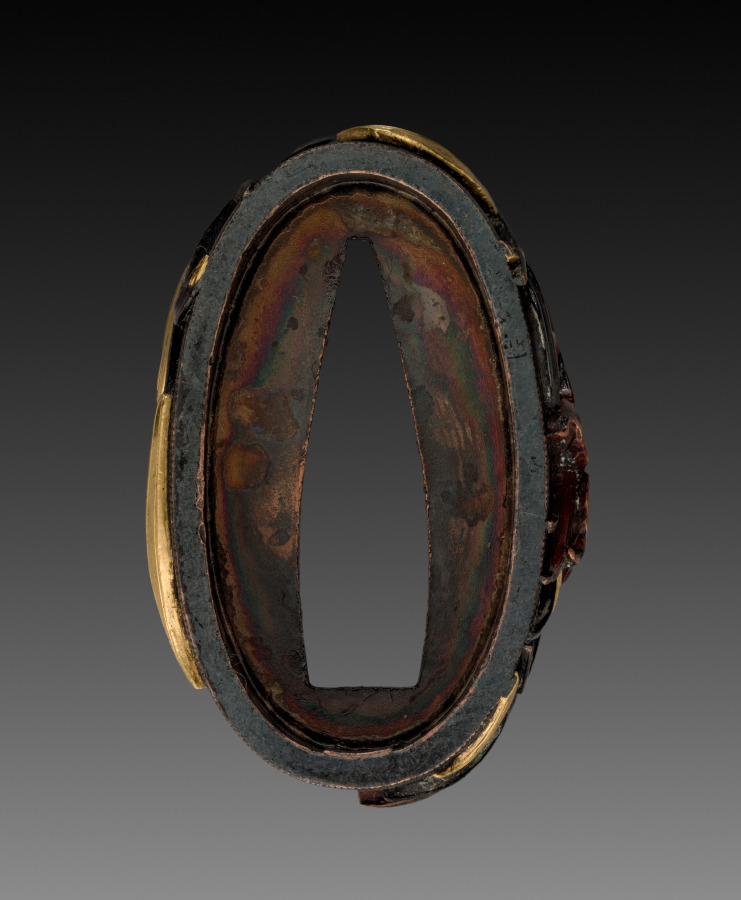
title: Sword-Hilt Collar (Fuchi) with Lily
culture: Japan, Edo period (1615–1868)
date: 1700–1850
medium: shakudo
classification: Arms and Armor